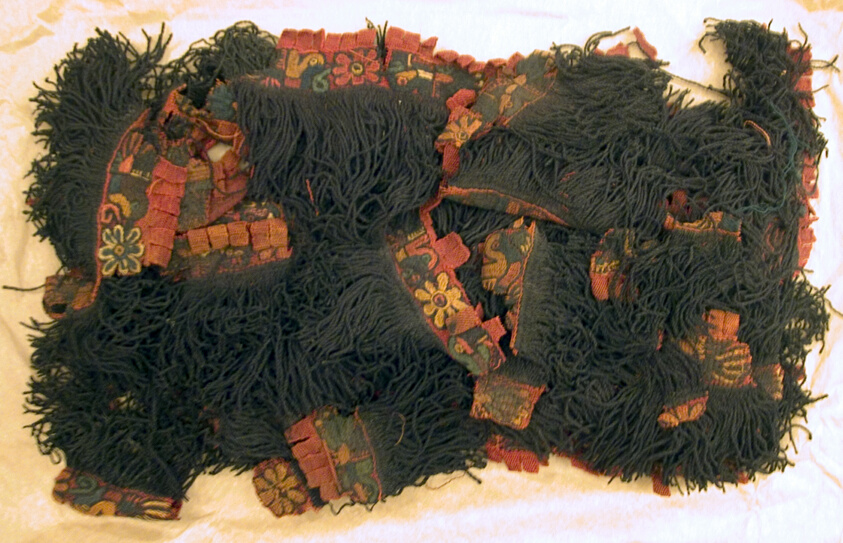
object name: Textile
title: Fragment (Border)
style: nazca, andean, andes, Pre-Columbian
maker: Nazca; Peru, south coast, Nazca Valley, Coyungo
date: 100 B.C./A.D. 200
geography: Peru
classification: textile; needlework (visual works)